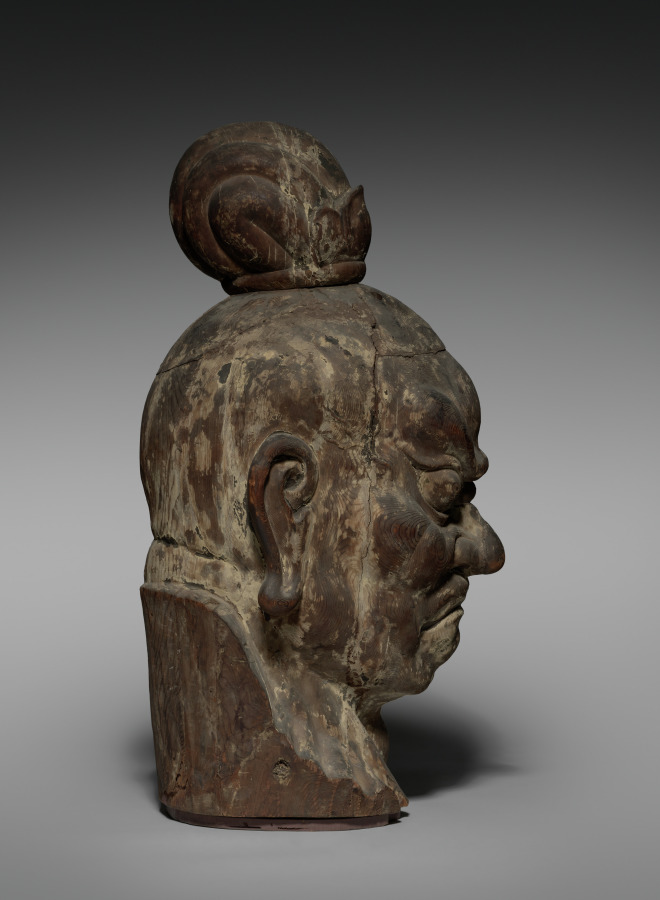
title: Head of Ni-o with Closed Mouth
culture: Japan, Kamakura period (1185–1333)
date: 1200s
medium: wood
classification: Sculpture